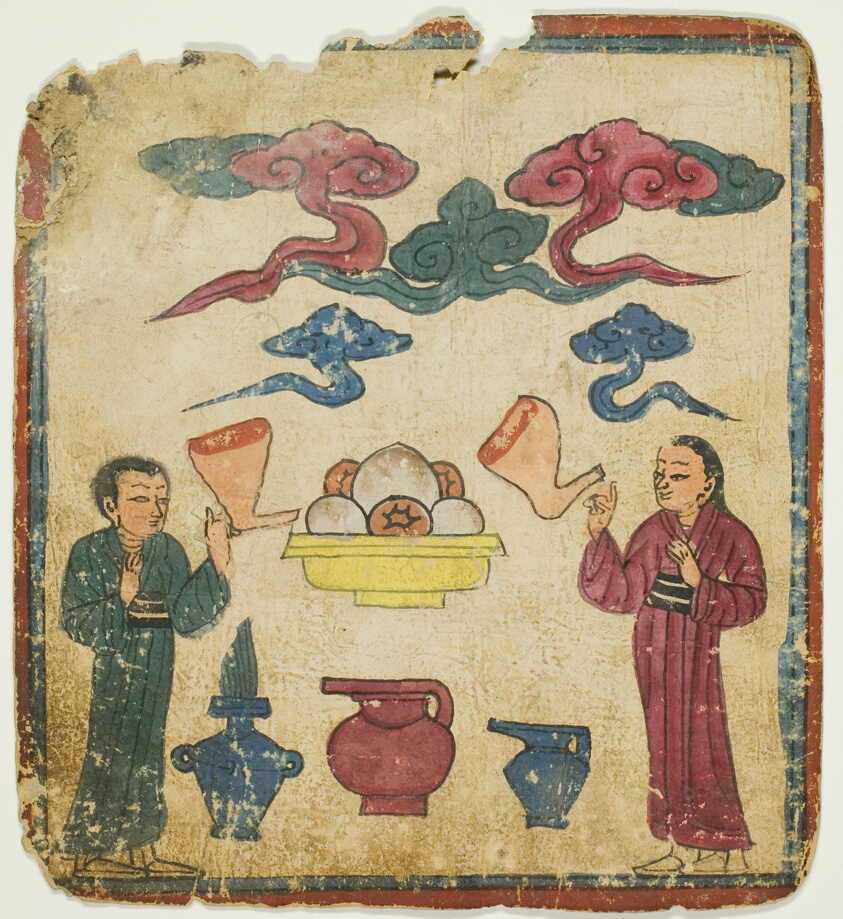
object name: Religious/Ritual Object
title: Image from a Set of Initiation Cards (Tsakali)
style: Himalayan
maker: Southern Tibet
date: 14th/15th century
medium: Ink and watercolor on paper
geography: Tibet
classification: ink; ritual objects